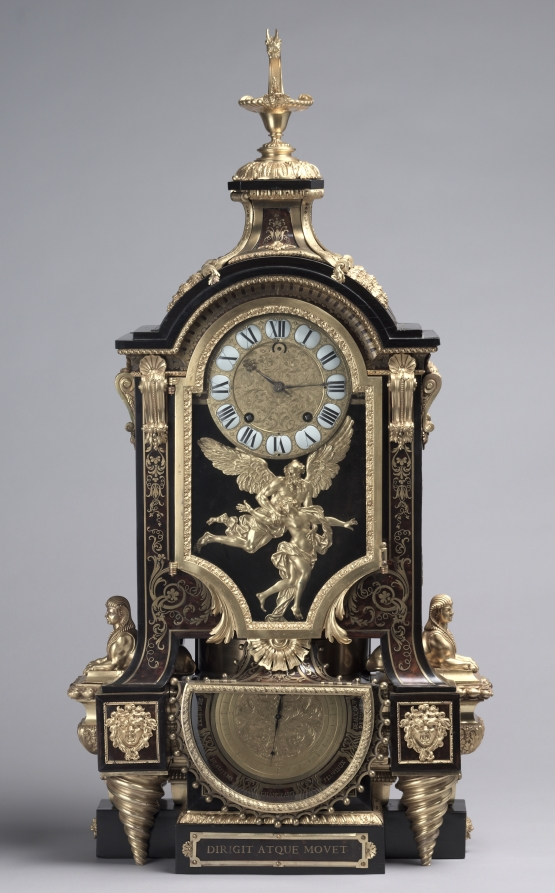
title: Clock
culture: France, late 17th Century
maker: André-Charles Boulle (French, 1642–1732)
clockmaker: Balthazar Martinot II (French, 1636–1714)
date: c. 1695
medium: tortoise shell and brass inlay, gilt bronze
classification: Furniture and woodwork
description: Appointed cabinetmaker to King Louis XIV in 1672, André-Charles Boulle became a master of furniture making in France during the late 1600s until his death in 1732. Known primarily for his use of marquetry, in which metal patterns are inlaid into tortoiseshell then applied within the veneered surface of the furniture, Boulle established a level of quality and craftsmanship few others could achieve. As a result, his work found favor at the royal court and among other aristocrats and diplomats eager to impress the king. Often exhibiting stout architectural proportions with elegant groups of inlaid motifs, Boulle’s designs are an example of the intellectual fashion for contrasting ideas, materials, and motifs. With its relatively new scientific invention of a pendulum mechanism and the addition of a barometer, the mantel clock represented the wealth, prestige, and intellect of its owner.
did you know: The Latin phrase inscribed on this clock, Dirigit atque movet, can be translated as "time constantly moves on."